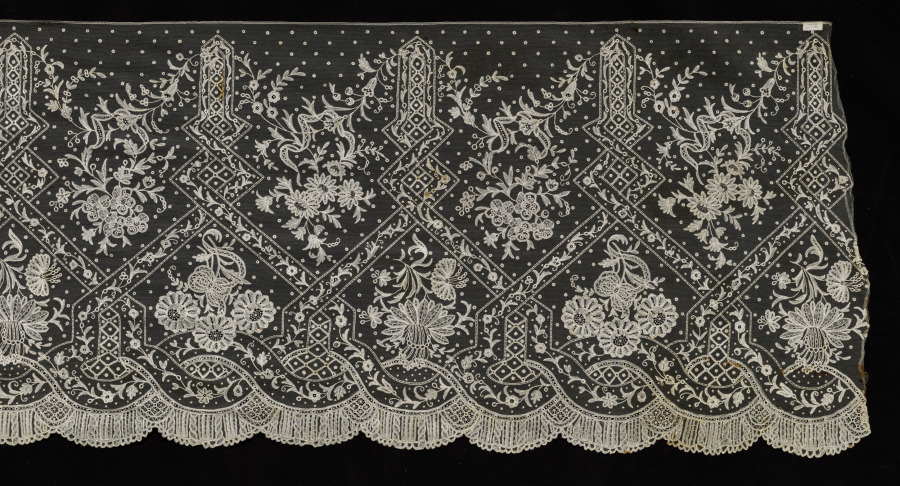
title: Lace Flounce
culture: Belgium, Brussels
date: 1811–99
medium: Machine-made lace net ground with bobbin lace appliqué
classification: Lace